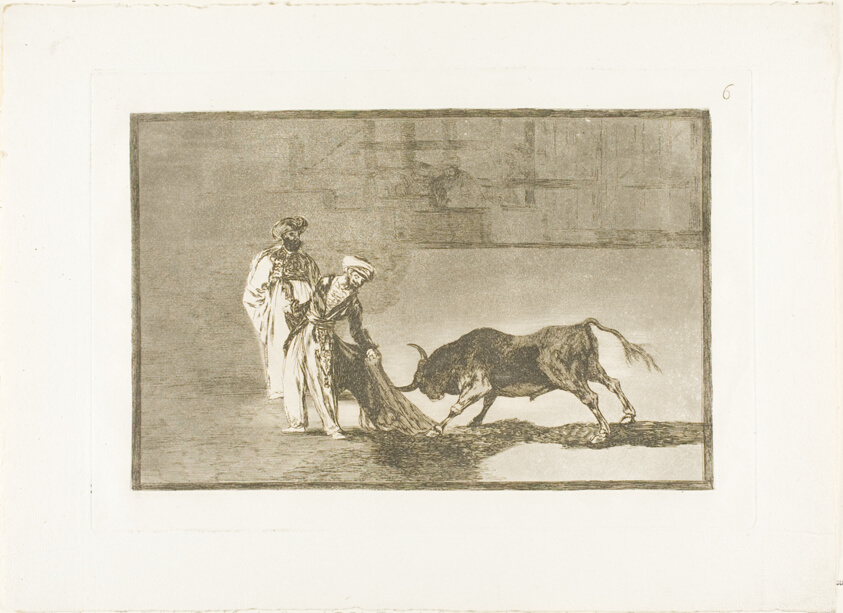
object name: Print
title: The Moors make a different play in the ring calling the bull with their burnous, plate six from The Art of Bullfighting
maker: Francisco José de Goya y Lucientes (Spanish, 1746-1828)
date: 1814/16, published 1816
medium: Etching, burnished aquatint and drypoint on ivory laid paper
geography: Spain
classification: etching; print; prints and drawing